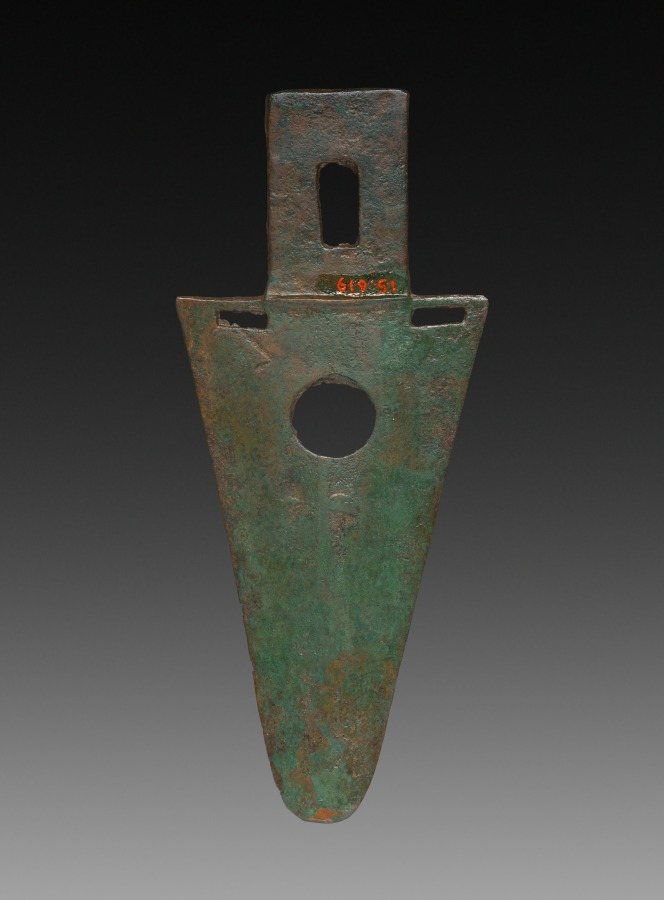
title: Spearhead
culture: China, Zhou dynasty (c. 1046–256 BCE)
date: 1045–256 BCE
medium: bronze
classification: Arms and Armor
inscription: Two ancient characters incised on the blade.